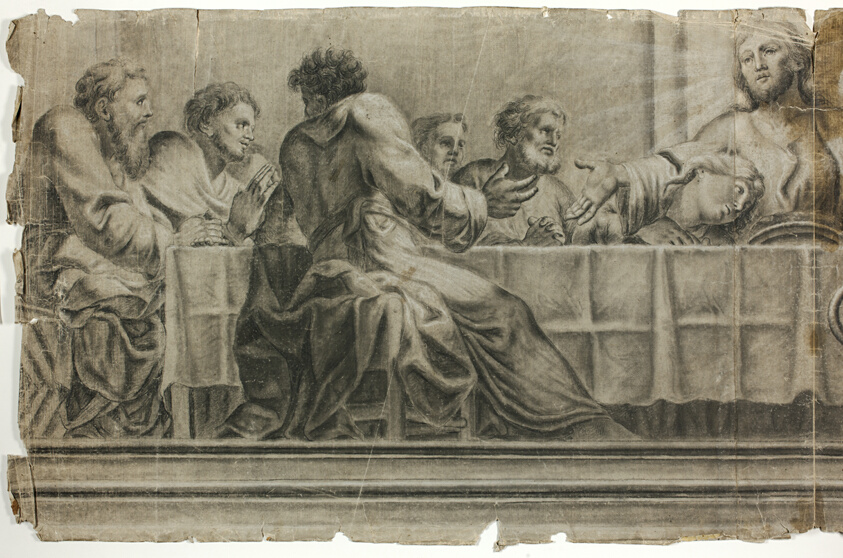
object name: Drawing and Watercolor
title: Last Supper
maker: Albrecht Schmid; German, 1667-1744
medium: Black chalk and charcoal with stumping, heightened with white chalk, on cream laid paper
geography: Germany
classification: chalk; charcoal; paper; drawings (visual works); prints and drawing